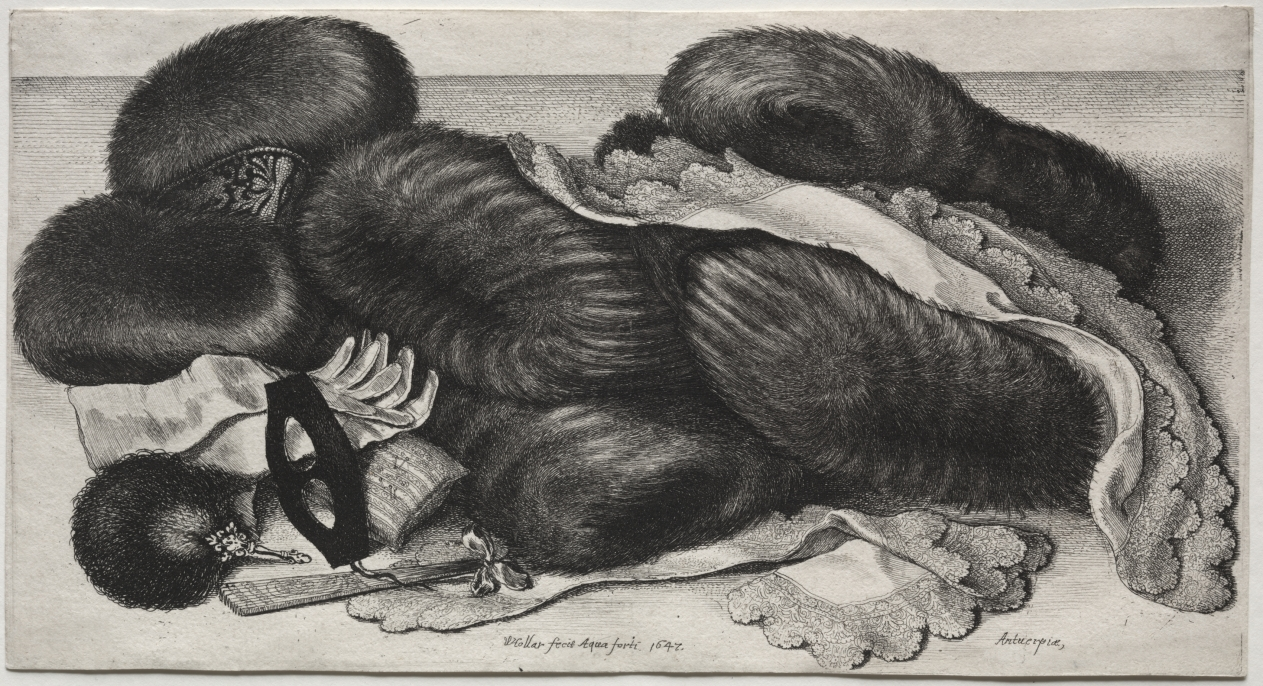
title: Muffs, Gloves, Collars and Other Articles of Toilet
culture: Bohemia, 17th century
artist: Wenceslaus Hollar (Bohemian, 1607–1677)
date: 1647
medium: etching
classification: Print